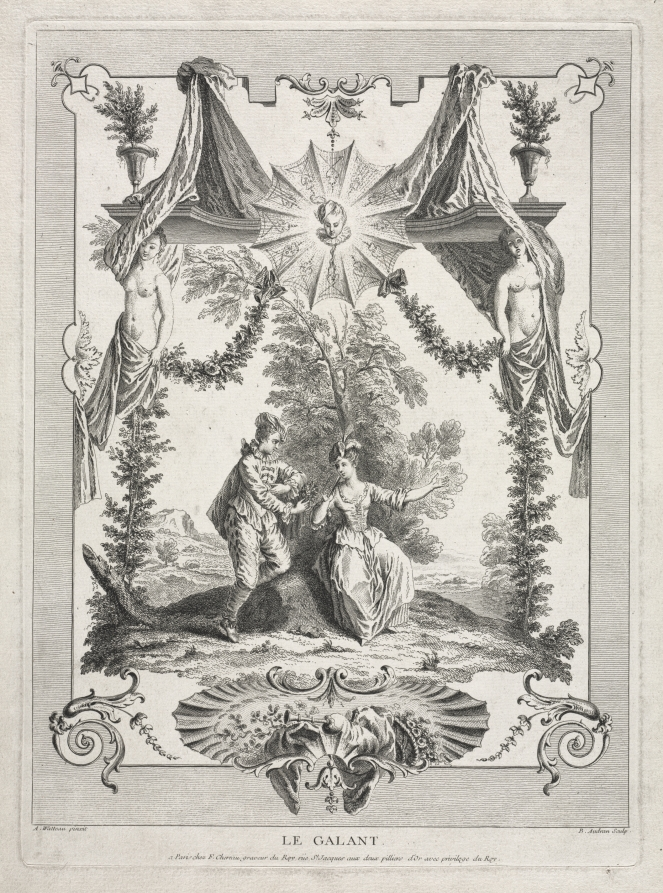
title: The Gallant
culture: France, 18th century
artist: Benoit II Audran (French, 1700–1772)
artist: after Jean-Antoine Watteau (French, 1684–1721)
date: c. 1711–1772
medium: engraving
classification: Print